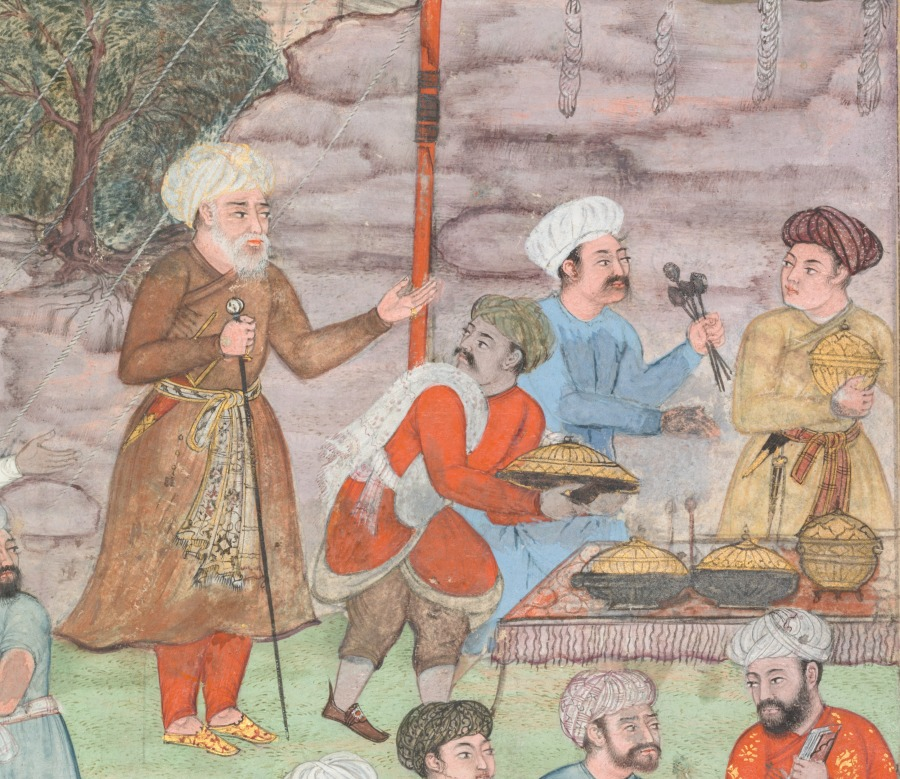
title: A feast for Babur hosted by his half-brother Jahangir Mirza in Ghazni in May 1505, from a Babur-nama (Memoirs of Babur)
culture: India, Mughal, 16th century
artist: Basavana (Indian, active c. 1560–1600)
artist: and Madhav Khurd (Indian, active late 1500s)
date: c. 1589; outer margins added c. mid-1900s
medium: Gum tempera and gold on paper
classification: Painting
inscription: verso: Persian text, in nasta‘liq script: . . . presented many gifts. In that year most of the rivers had become very swollen, to the extent that the Dih-i Ya‘qub River could not be forded. I brought the boat I had made at the lake and floated it in the waters of Dih-i Ya‘qub opposite Kamri and all the people crossed by boat. For this reason we went through the Sajavand pass and straight through crossing the river at Kamri by boat. We arrived at Kabul in the month of Dh’ul-Hijja [May 1505]. A few days earlier, Sayyid Yusuf Beyg had died of colic. At Kush Gunbad, Nasir Mirza had requested leave and remained behind to get provisions for his retinue from his own domain, saying he would follow in two or three days. Once he had left us he sent his entire army to the Nur valley on account of a minor act of disobedience by the people of the Nur valley. [Given] its rice fields and the location of its citadel on the peak of the mountain as . . .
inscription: recto: Persian inscription in bottom margin, in nasta‘liq script: the work of Basavana / [ . . . ] / Madhav Khurd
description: Twenty-one years before his conquest of Delhi, Babur took control of territories in Afghanistan, including the cities of Kabul and Ghazni. His half-brother, who controlled the region around Ghazni, ordered that a party be thrown in honor of Babur’s arrival from the north. Drinking parties and feasts in lavish movable tent settings, where gifts were exchanged, alliances forged, and relationships cemented, were as important to the building of the empire as the battles.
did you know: A manager directs servers to bring spoons and lay out the buffet table.